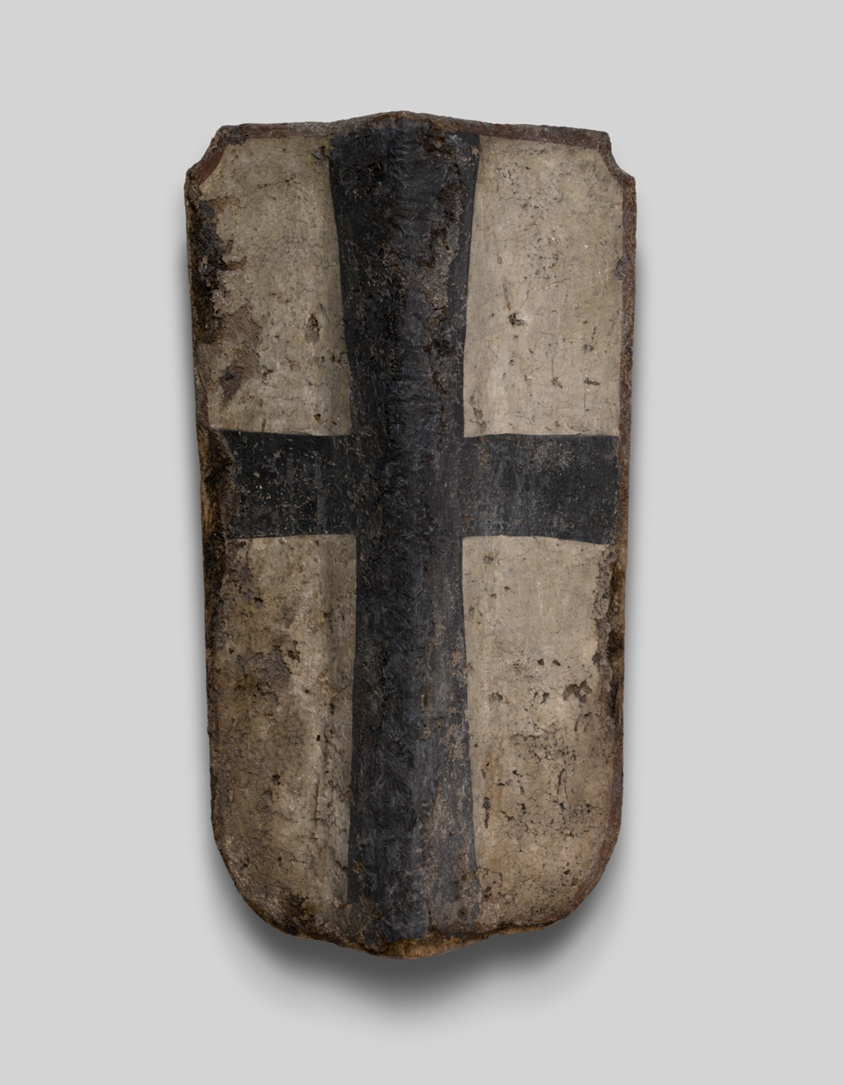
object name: Armor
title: Hand Pavise with the Coat of Arms of the Teutonic Order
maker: German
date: c. 1450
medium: Fir, iron, hemp fiber, gesso, and pigment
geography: Germany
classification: shield; armor; arms and armor